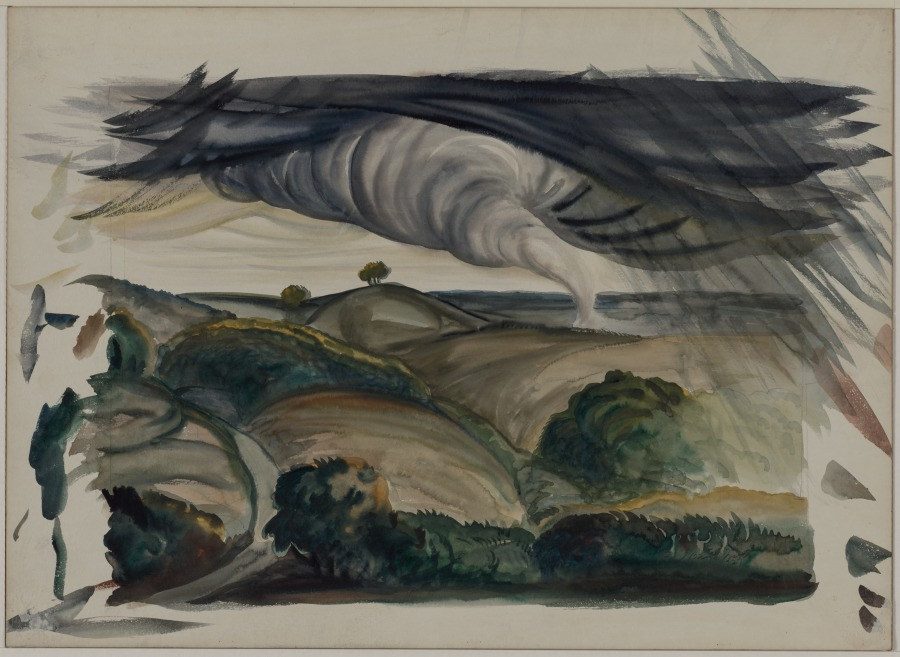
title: Tornado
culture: America, Ohio, Cleveland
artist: Paul B. Travis (American, 1891–1975)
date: 1927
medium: watercolor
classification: Drawing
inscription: Signed Paul Bough Travis 1927, lower right corner